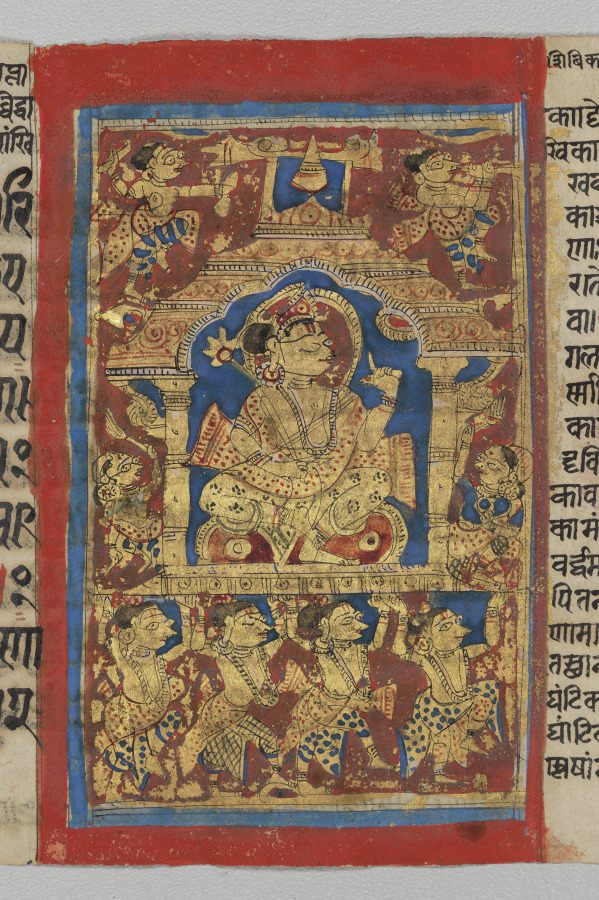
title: Mahavira Rides in His Initiation Palanquin, Folio 36 (recto), from a Kalpa-sutra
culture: Western India, Gujarat, last quarter of the 15th century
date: c. 1475–1500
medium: Gum tempera, ink, and gold on paper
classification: Painting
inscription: [[upper right]] śibikā vimāna